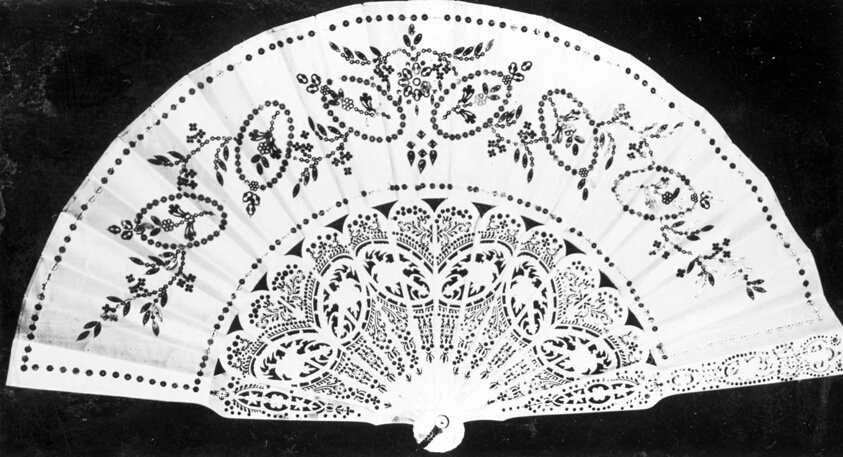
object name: Costume and Accessories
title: Fan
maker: France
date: c. 1870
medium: Lace silk mount decorated with silver spangles; carved pearl sticks; pearl rivet, metal loop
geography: France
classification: textile; fan - weaving; costume accessory - folding fan; costume accessory; costume